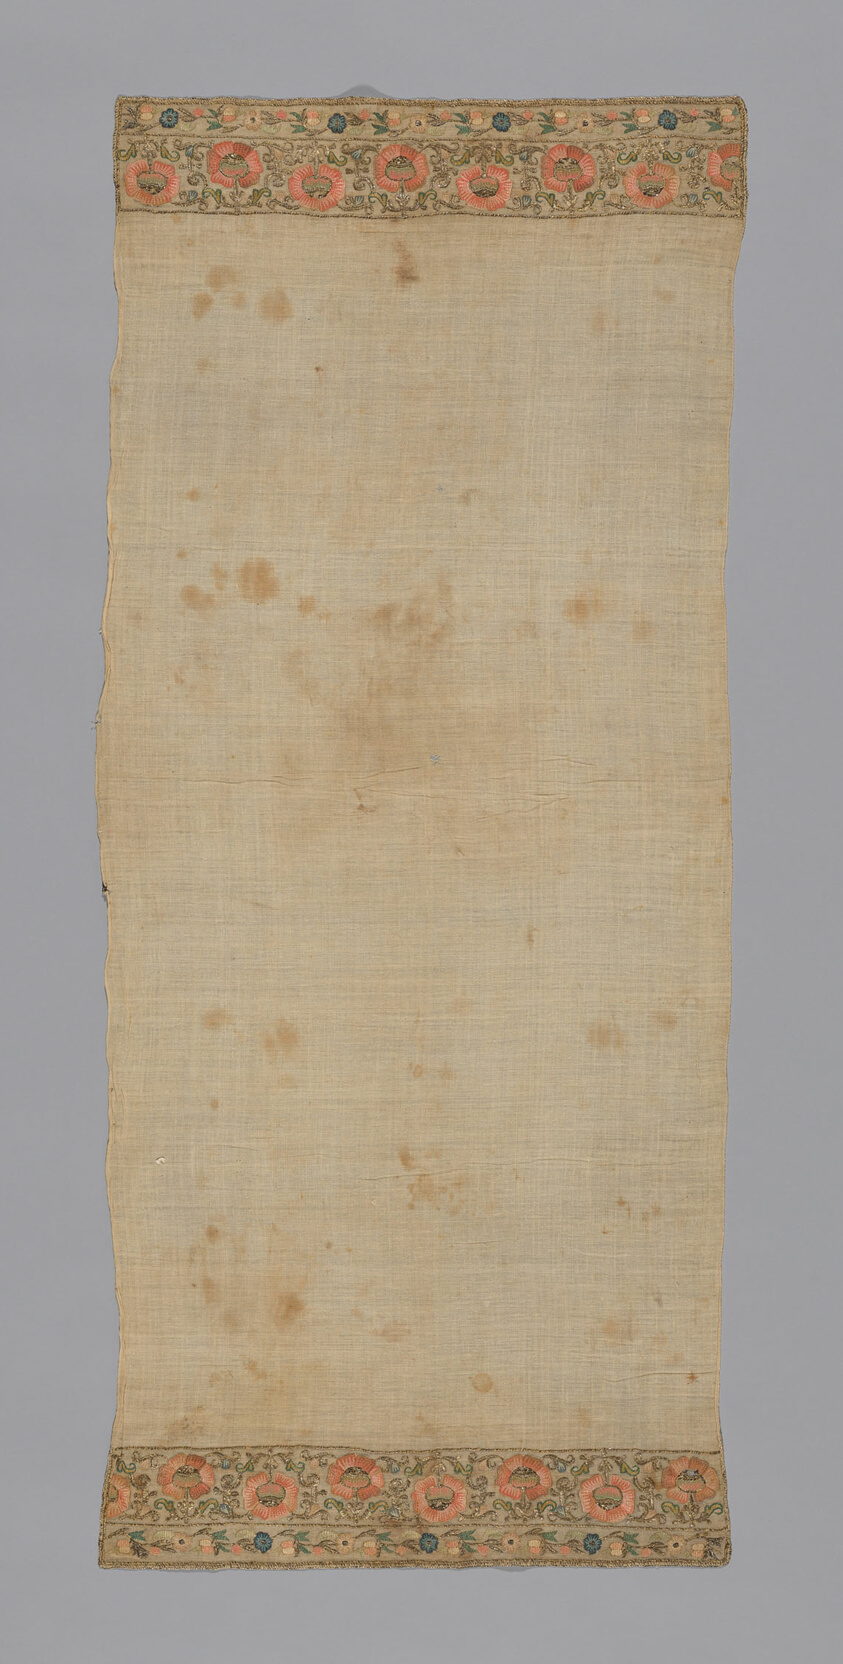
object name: Textile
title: Towel or Napkin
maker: Turkey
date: 19th century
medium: embroidered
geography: Turkey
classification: textile; needlework (visual works); weaving